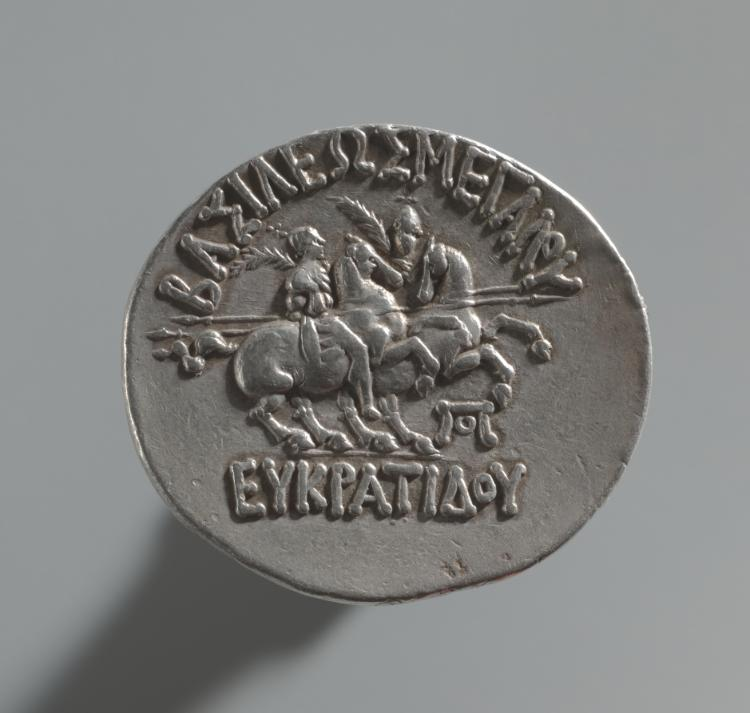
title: Coin of Eukratides I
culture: Afghanistan, Bactria, Eucratides I (171–145 BCE)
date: 170–145 BCE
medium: silver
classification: Coins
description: After Alexander of Macedon succeeded in conquering Egypt and Persia in 331 BC, his ambition to rule the known world led him further east across Bactria in Afghanistan, through the Hindu Kush mountain pass, and into India. There he succeeded in defeating all the local kings of the region until his men, on the brink of mutiny, insisted that they return to Greece. Alexander left governors in charge of his territories, and after his death in 323 BC, his governors became independent kings, establishing Hellenistic cities and a Greek cultural base in the region, which lasted for almost 200 years. The king of Greek descent who ruled over territories in Afghanistan and Pakistan depicted himself with the brimmed military helmet with the bull's ear and horn of Poseidon, worn by generals from Macedon, the northern Greek country from which Alexander came. After his death, Alexander's vast empire that stretched from Macedon across Egypt and Persia all the way to the Indus River was divided among military leaders in his army. On the reverse side of this coin are the twins Castor and Pollux riding horseback with long spears. These twins were sons of Zeus. Since Alexander considered himself to be an offspring of Zeus, Eukratides referenced his link to Alexander by including them on his coin.